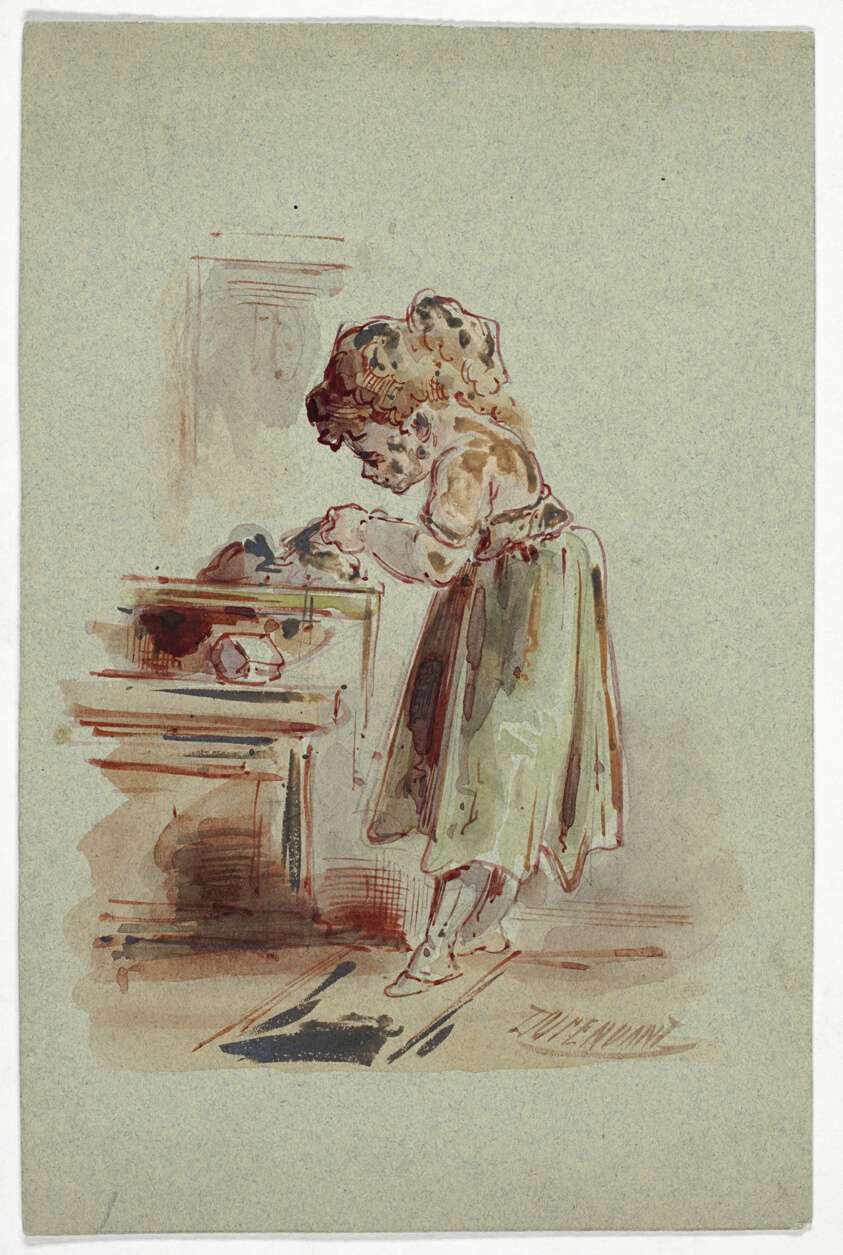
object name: Drawing and Watercolor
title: Little Girl Cooking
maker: Dupenvant; French, 19th century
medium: Pen and red ink, with watercolor, over traces of graphite, on board faced with green paper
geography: France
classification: pen and ink drawings; drawings (visual works); prints and drawing